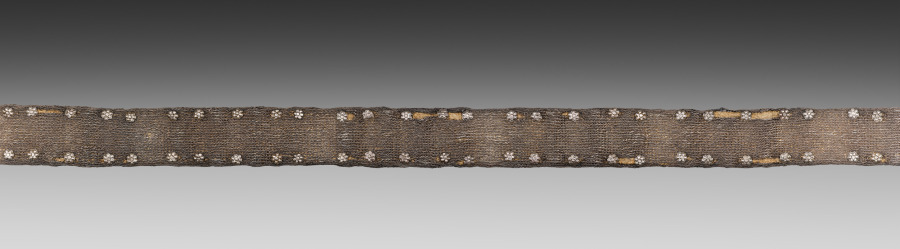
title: Belt for a Lady's Dress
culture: Italy, Siena(?)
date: c. 1375–1400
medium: basse-taille enamel and gilding on silver, silver thread, gilt-silver buckle, cast and chased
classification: Jewelry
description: Because of its extraordinary richness, this belt (also known as a girdle) was both an ornament for the body and an object of great personal luxury. Almost eight feet in length, belts like this were at the height of fashion for both men and women. After being passed around the waist and through the buckle, one end of the belt would fall to the hem of the garment. The belt's many colorful enamel plaques are worked in translucent enamel over decoration engraved into the silver beneath (an enameler's technique known as basse-taille). Within the plaques and cast into the buckle are scenes of courtly love, musicians, and fantastic animals. A large number of translucent enamels were made for secular objects during the late Middle Ages for use on jewelry, cups, garment clasps, and similar objects. This belt is a rare survival among these now scarce objects.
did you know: Look closely at the tiny scenes of courtly love on the plaques that adorn this belt. Given their size, these scenes were designed for the enjoyment of the woman who wore this belt over a sumptuous dress rather than an admirer from a distance.